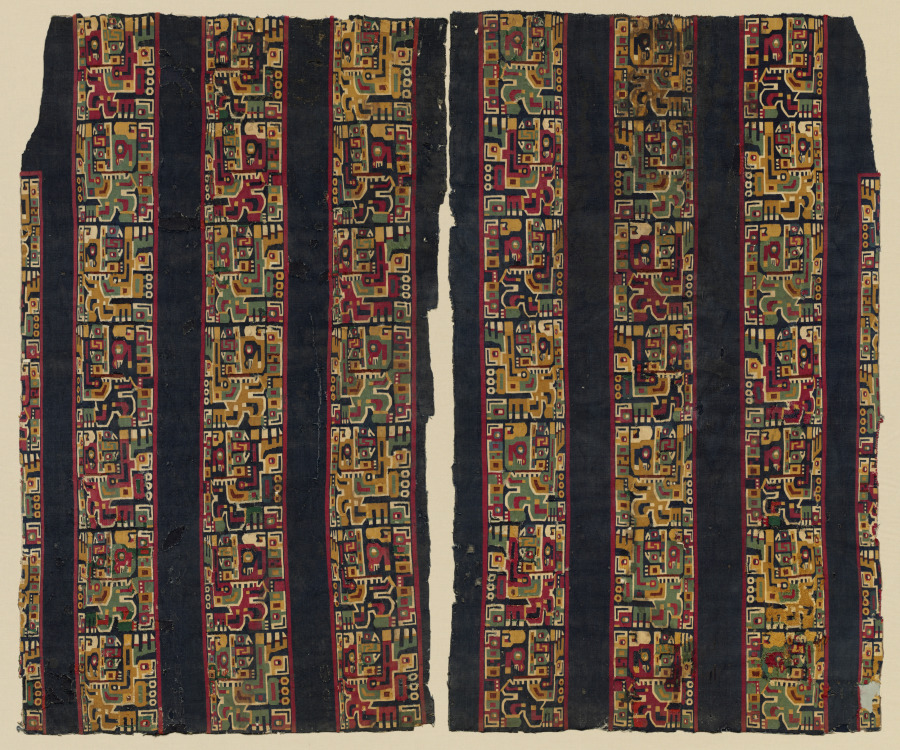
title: Tunic Fragments with Bird-Headed Creature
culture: Central Andes, Middle Horizon, Wari, 6th-11th century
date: 600–1000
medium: Camelid fiber, cotton; tapestry weave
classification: Textile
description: The bird-headed creature in profile that repeats in each of this tunic's design fields gazes upward, holds a staff of authority in front of its body, and wears an ornate headdress behind which a three-feathered wing can be seen. The extremely high technical quality of such tunics suggests that the Wari reserved bird imagery for their most exalted rulers. Here, the original incorporated more than twice as much yarn as the routine--some 19 miles, all handmade and much dyed an inky, dark blue, the most prestigious of Wari colors.